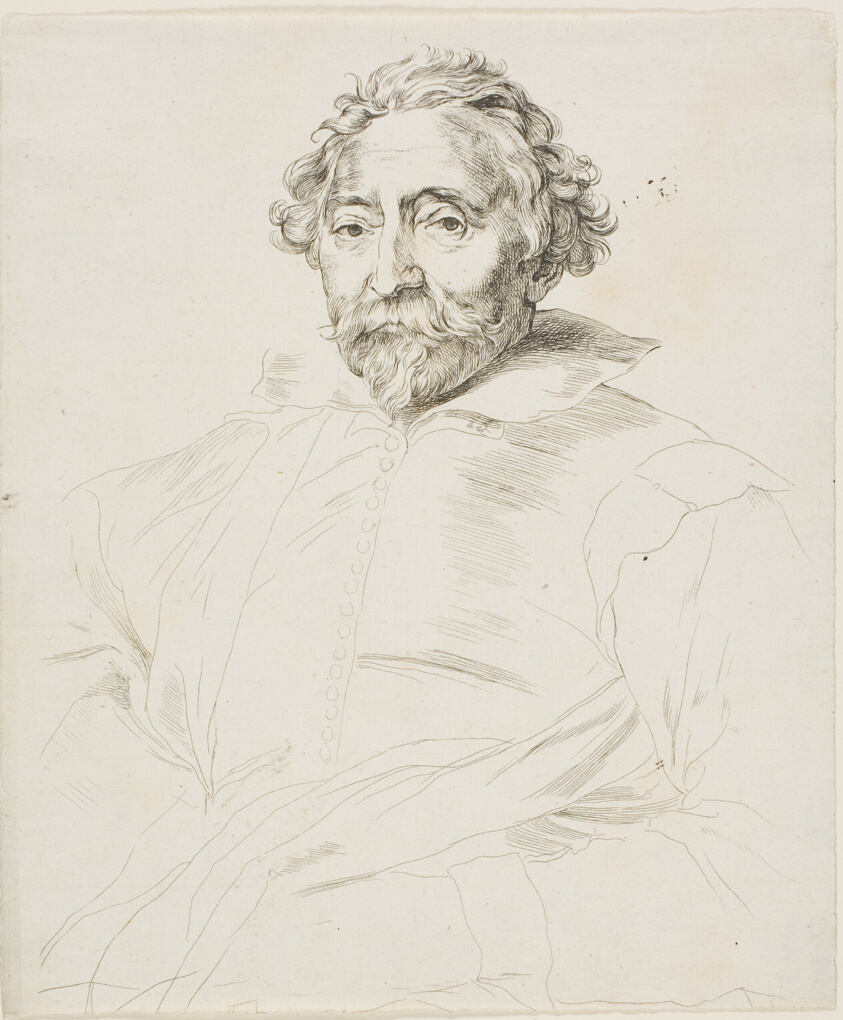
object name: Print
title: Willem de Vos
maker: Unknown artist (after Anthony van Dyck (Flemish, 1599-1641))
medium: Etching in black on paper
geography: Flanders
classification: etching; print; prints and drawing